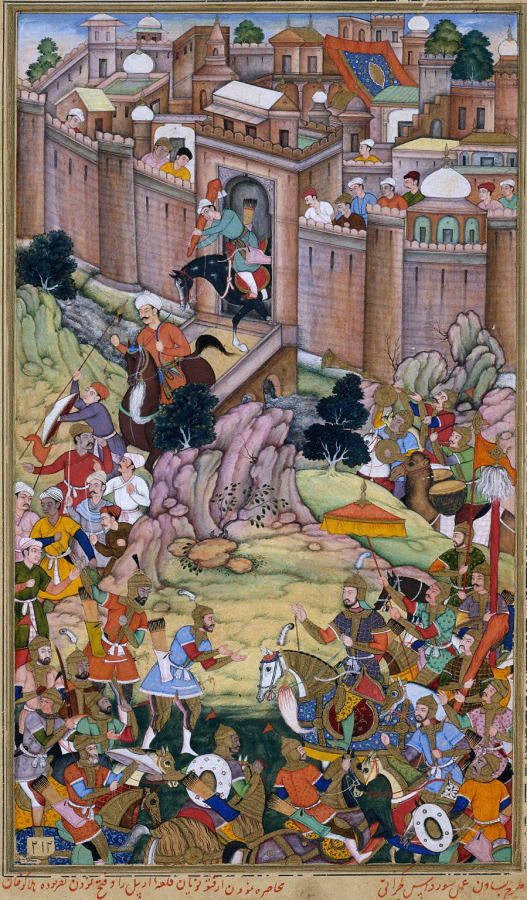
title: The siege of Arbela in the era of Hulagu Khan, from a Chingiz-nama (Book of Chingiz Khan) of the Jami al-tavarikh (Compendium of Chronicles) of Rashid al-Din (Persian, 1247–1318)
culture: Mughal India, court of Akbar (reigned 1556–1605)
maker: Basavana (Indian, active c. 1560–1600)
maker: and Sur Das Gujarati (Indian, active 16th century)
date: c. 1596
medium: Gum tempera, ink, and gold on paper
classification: Painting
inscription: recto lower left: [translated] Siege of the fort of Irbil by Urgatu Nuyan and the attainment of victory by command of Hulagu Khan.; verso overall: [text]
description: A Mongol conqueror riding a white horse gazes stonily at his defeated West Asian opponent in a scene that took place more than 300 years before this painting was made. By the end of the 1500s there was a new emphasis on creating paintings to accompany historical texts. Visually, the diagonal composition with cityscape at the top of the page—also found among the earliest Mughal paintings—was expanded to include throngs of participants and a startling new naturalism. Painting from the Akbar period reached its maturity by the 1590s in works such as this: dynamic in composition and gestures but contained within organized spaces and emphasized three-dimensionality.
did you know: The lord of the citadel in blue is negotiating its surrender to the Mongol general, who rides the white horse in the lower right.